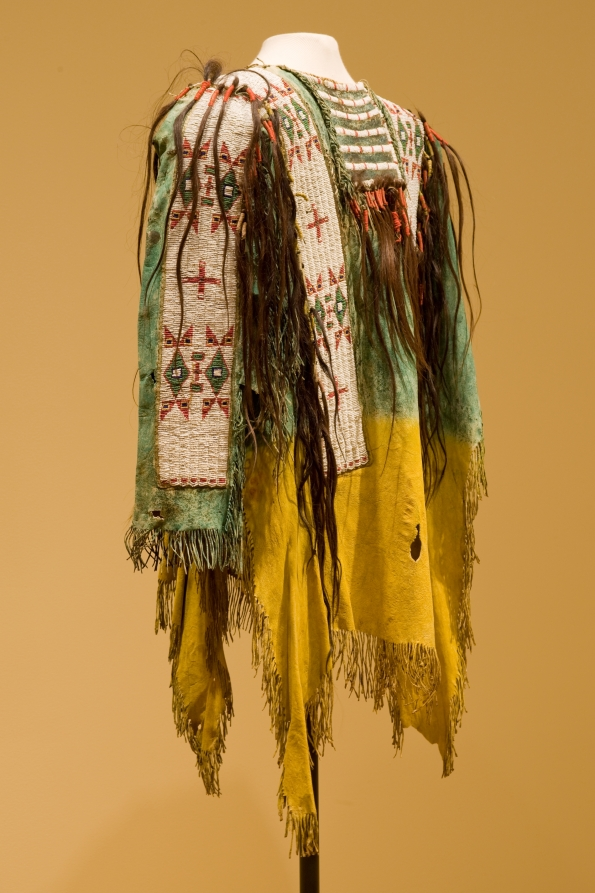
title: Hide Shirt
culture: America, Native North American, Central Plains, Lakota Sioux, 19th century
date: c. 1890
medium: hide, pigment, glass beads, human hair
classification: Textile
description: Traditionally, only Lakota (Sioux) head chiefs had the right to wear painted shirts, an honor they earned through sacrifice and bravery but lost by failing in their responsibilities. By the time this example was created, European Americans had confined the Lakota to reservations, and painted shirts had become the privilege of battle veterans rather than of active warriors. Family members probably donated the locks of hair, each representing a war exploit.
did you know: Only Lakota (Sioux) chiefs had the right to wear painted shirts, an honor they earned through bravery.